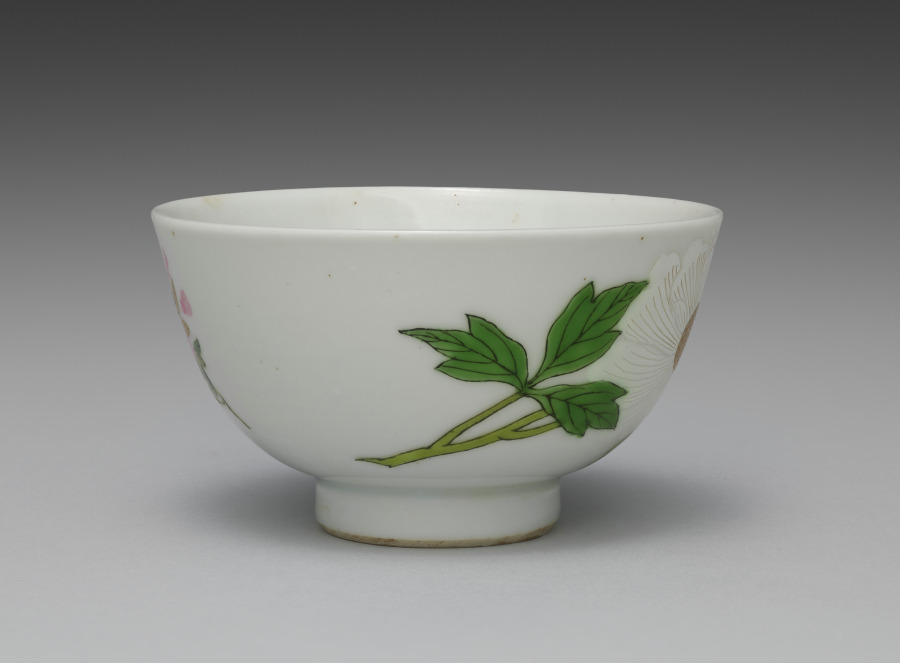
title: Teabowl from Teabowls with Peony and Crabapple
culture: Japan, Meiji period (1868–1912)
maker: Seifū Yohei III (Japanese, 1851–1914)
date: 1893–1914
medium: One from a set of five teabowls; porcelain with underglaze and overglaze color enamels and gold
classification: Ceramic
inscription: 清風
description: Overglaze color enamels are generally called iro-e (literally “color picture”) in the terminology customarily used for porcelain decoration of the Edo period. This set of teabowls is a fine example of Yohei III’s skilled use of the technique, which is identified on this set’s box lid with the alternate phrasing “porcelain with color painting” (jisaiga). Distinct from the way overglaze colors were used in Kakiemon ware from Arita, his designs and applications show a consciousness of porcelain decoration of the Qing dynasty. Here, he combines Chinese models with a sensibility taken from Kyoto ware precedents, including painting with powdered gold (kinrande). The colors used in the bowls are as follows: blue, black, gold, white, light green, green, and pink. The black iron, used for stems and leaf veins, is painted over the glaze. The gold, also painted over the glaze, is used for leaves and the centers of flowers, for solid, glossy lines defining detail, or as a semimatte ground. The white of the peony flower is built up to a low relief over the glaze. Yohei has incised lines of varying widths into the pigment, carving away to the bowl’s surface, to differentiate individual petals and their rippled shapes. The light and dark greens, as well as the pink, are painted over the glaze. Of note is how Yohei has first used thinly applied lines of light green to draw the plum branch before applying the opaque iron black. For the plum buds and flowers, he has used a diluted pink with an opaque pink for outline, both over the glaze. In his later works, Yohei used pink both over and under the glaze in a manner similar to underglaze blue, and it can be challenging in some cases to discern which technique he has used. A lidded container in a private collection has a similar design but is augmented with the inclusion of white and purple magnolia blossoms. In contemplating the original decorative program of a set, of which these teabowls may have been a part, it is worth considering that perhaps not all objects included the full range of motifs. In such cases, the composition of the individual object may be best understood within the context of the extended ensemble. Here, the delicate pink plum on one side of the bowl seems slightly unbalanced with the bold white peony on the other, but when seen with other objects with the magnolia and its additional colors and shapes, it is possible to imagine a set with a complex, balanced design across multiple pieces.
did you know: Blue appears only inside the footring, as a double band of underglaze color.